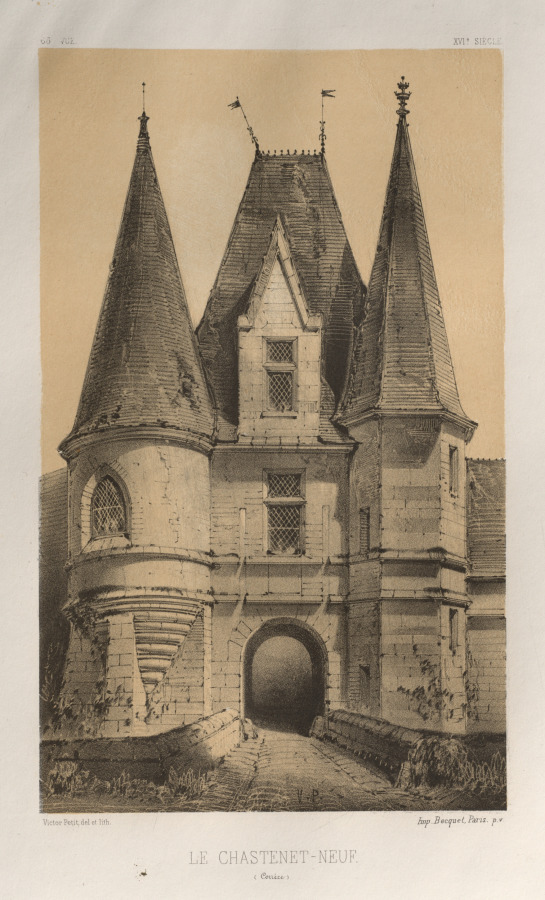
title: Architecture Pittoresque ou Monuments des XVeme. Et XVIeme. Siecles: Chateaux de France des XV et XVI Siecles: Pl. 65, Le ChasteLet-Neuf (Corrèze)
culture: France, 19th century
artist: Victor Petit (French, 1817–1874)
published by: Charles Boivin (publisher and editor); Lith de Godard a Paris (printer)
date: 1860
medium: lithograph with tint stone, from portfolio of 100 lithographs with tint stone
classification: Print